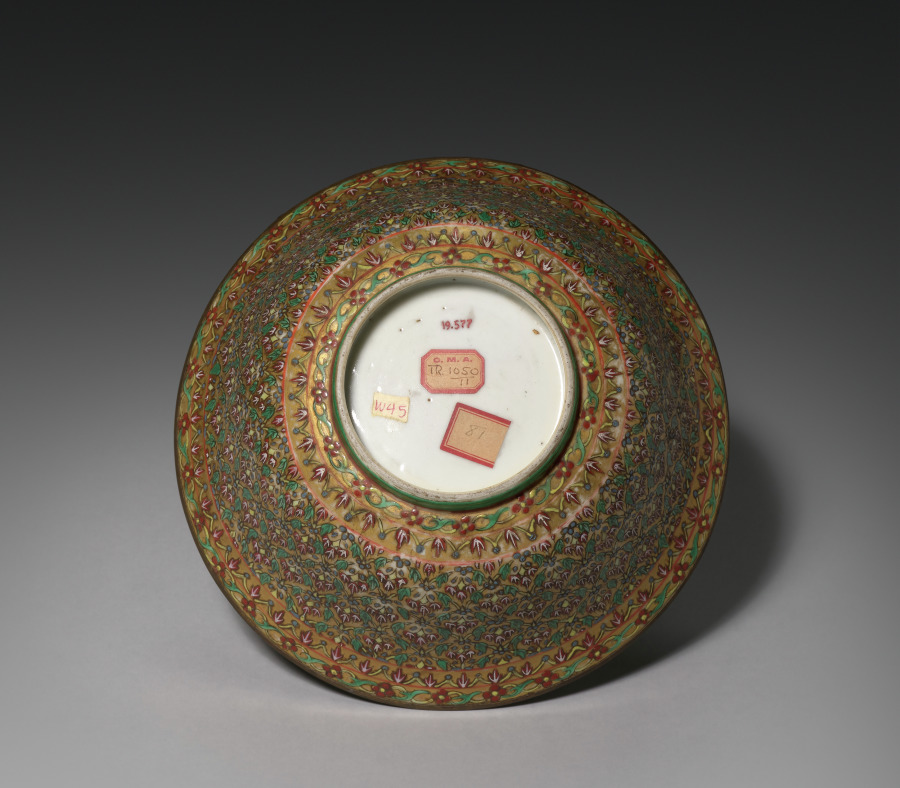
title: Chow Bowl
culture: Siam, 18th century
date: 1700s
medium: porcelain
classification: Metalwork